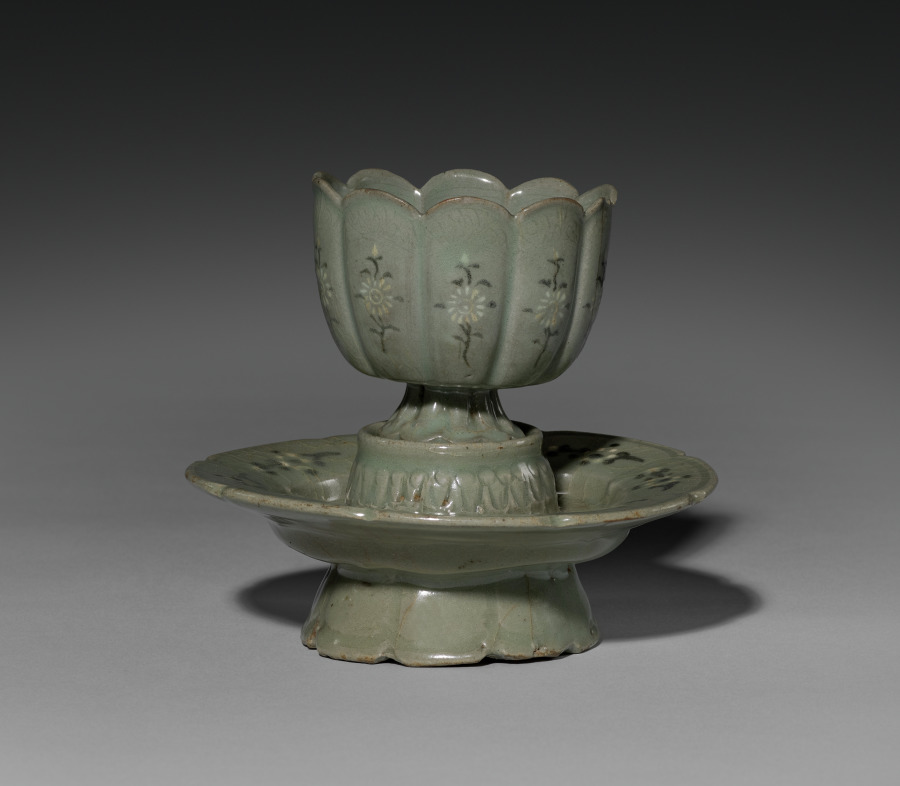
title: Floral-shaped Cup and Saucer with Inlaid Chrysanthemum Design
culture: Korea, Goryeo dynasty (918–1392)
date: 1100s-1200s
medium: Celadon ware with inlaid white and black slip decoration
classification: Ceramic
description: In Korea, chrysanthemum flowers and leaves were made into both tea and wine. Chrysanthemum wine was enjoyed during the the Double Nine Festival (the ninth day of the ninth month in the lunar calendar) praying for longevity. The flower design on the saucer is less delicate than the cup, suggesting that the cup and saucer originally were not related to each other.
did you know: Elites of the Goryeo period are known for their love of drinking tea and wine. In Korea, chrysanthemum flowers and leaves were made into both tea and wine.